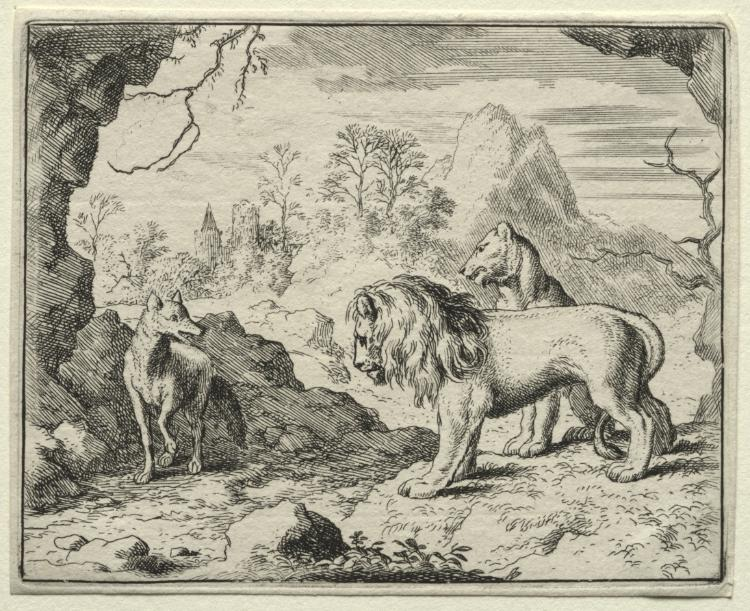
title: Reynard the Fox: Reynard Tells of Hidden Treasure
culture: Netherlands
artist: Allart van Everdingen (Dutch, 1621–1675)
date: 1650–75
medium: etching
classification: Print